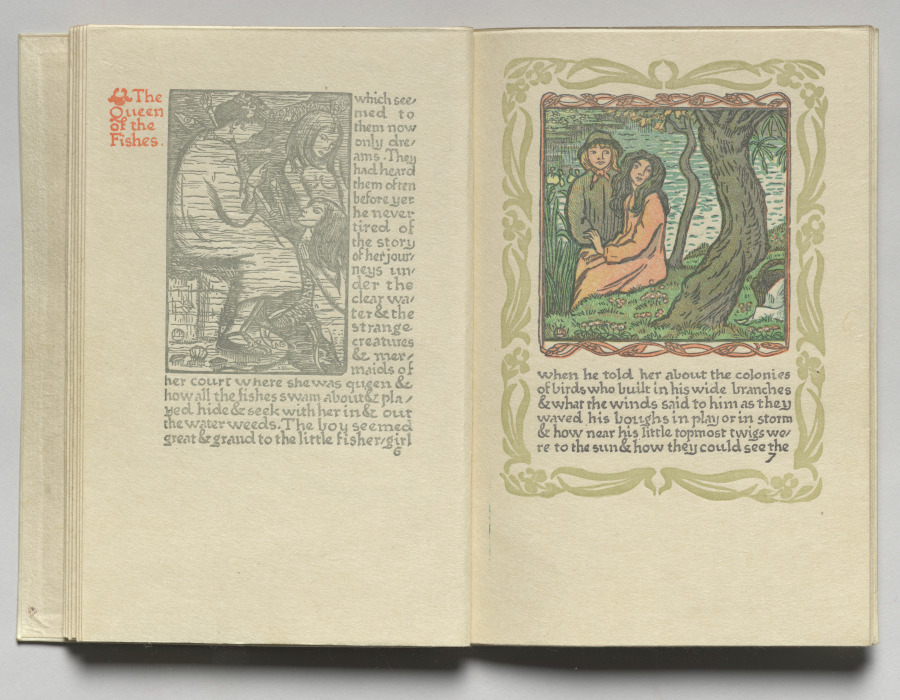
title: The Queen of the Fishes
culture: England, 19th century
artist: Lucien Pissarro (British, 1863–1944)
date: 1894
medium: Bound volume with color wood-engraved illustrations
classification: Bound Volume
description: “The Queen of the Fishes” is a French fairy tale about two mistreated children who turn into a fish and an oak tree. This edition was the first book published by the Eragny Press, the private firm of Lucien Pissarro, son of impressionist painter Camille Pissarro. Following the example of William Morris, Lucien wanted to return to the careful design and high-quality materials of early printed books. He and his wife, Esther Bensusan Pissarro, made this publication almost entirely by hand, including designing and engraving all the illustrations and ornaments.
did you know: Lucian Pissarro was a son of Impressionist painter Camille Pissarro.